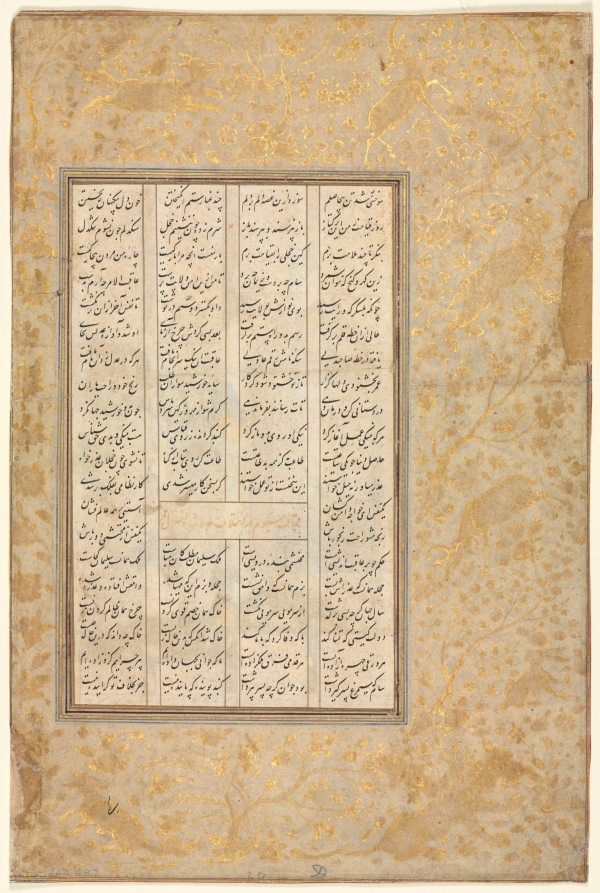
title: The Story of Nushirwan and his Minister, "The Third Discourse on Diverse Events and Disorder in Life" from a Khamsa (Quintet) of Nizami (1141–1209) (verso)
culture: Iran, Qazvin, Safavid period (1501-1722)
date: 1555–65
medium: ink and gold on paper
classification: Manuscript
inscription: script: Nasta'liq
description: This scene is from the Makhzan al-Ashrar, the first of the Quintet. Although more historically oriented than the following poems, it served more as a vehicle for moralizing tales than for historical events. In this scene Nushirwan asks the sage Buzurgmihr to explain what the owls perched on a ruined building are saying. He explains that one owl is offering the other as many ruined cities as he likes in exchange for his daughter's hand. He thus reproves Nushirwan for his love of conquest and war and the consequent destruction of many cities.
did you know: King Nushirwan is on a white horse, while his minister Buzurjmihr is riding a mule.